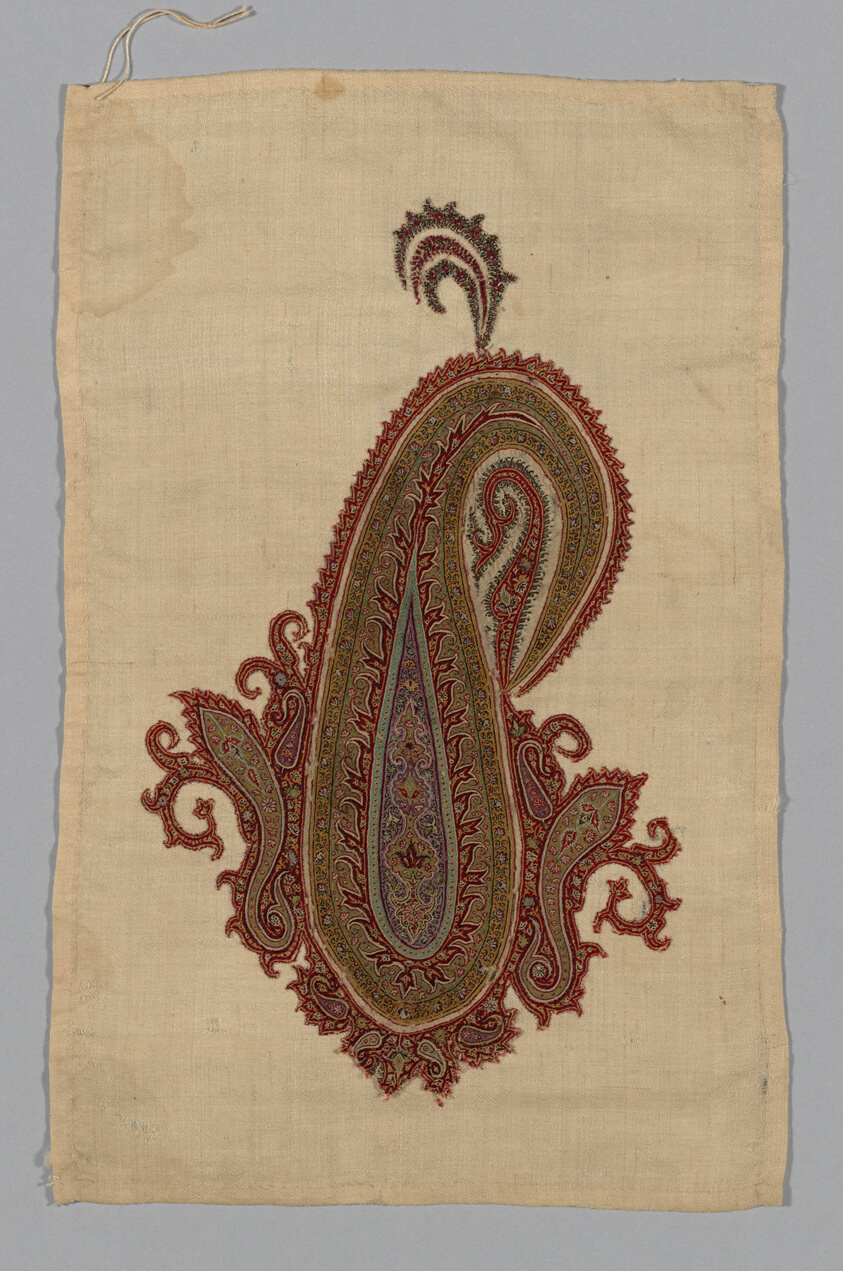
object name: Textile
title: Shawl Fragment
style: 19th century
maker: India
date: 1870s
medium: Wool, embroidery on twill weave foundation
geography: India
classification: weaving; textile; fragment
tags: paisley, design